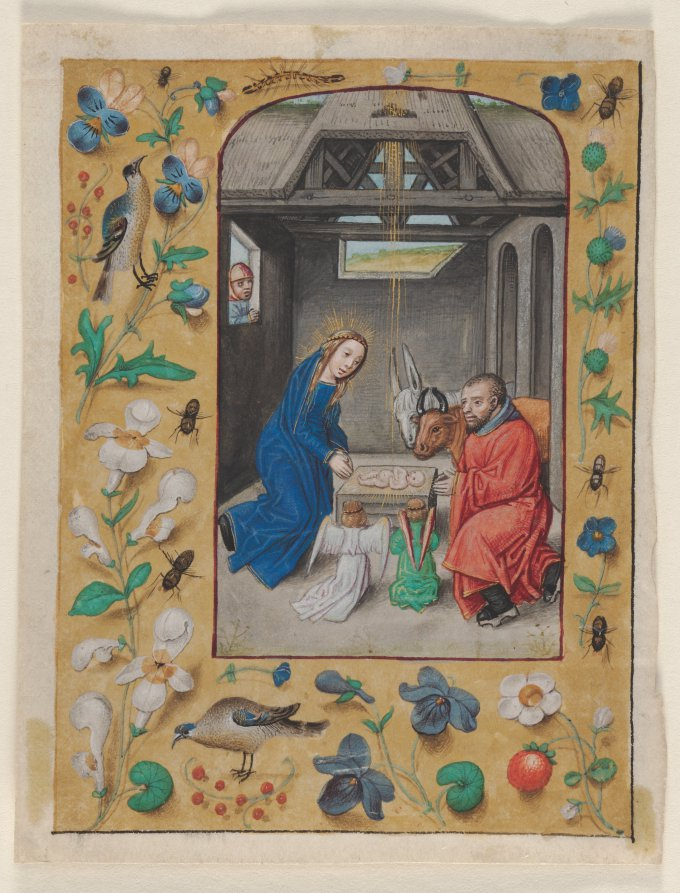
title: Leaf Excised from a Book of Hours: The Nativity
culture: Flanders, Ghent, 15th century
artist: Master of the First Prayerbook of Maximillian (Flemish, c. 1444–1519)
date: c. 1480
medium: ink, tempera and liquid gold on vellum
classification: Manuscript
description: This book, made by an artist of the Ghent-Bruges school of illumination, represents the culmination of Flemish book painting. Its main features were the use of rich colors, decorative and illusionistic effects, a love of landscape, and a strong sense of visual narrative. Its most distinctive innovation was the development of a new style of border decoration featuring realistic motifs which cast shadows onto colored grounds to create an effect of spaciousness. These motifs included a diverse assortment of flowers, butterflies, insects, birds, and sprays of acanthus foliage.